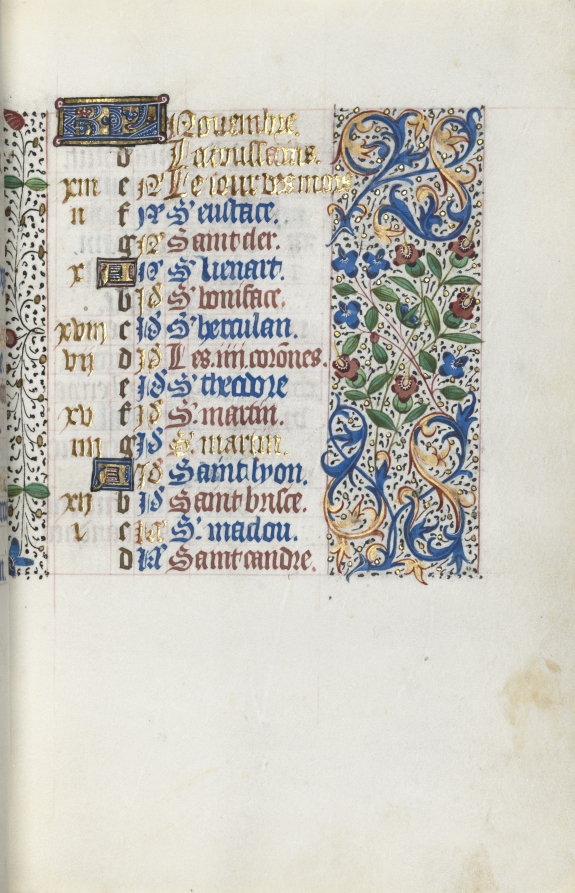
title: Book of Hours (Use of Rouen): fol. 111r, Calendar Page for November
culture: France, Rouen, 15th century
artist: Master of the Geneva Latini (French, active Rouen, 1460–80)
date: c. 1470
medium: ink, tempera, and gold on vellum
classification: Bound Volume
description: In the late 1400s and early 1500s Rouen was an established and important center of book production. The city’s cathedral had a wealthy chapter that spent large sums of money to commission books and to maintain its extensive library. The stationers and booksellers would have likely been concentrated in or near the cathedral precinct. This artist, named after a manuscript now in Geneva, was Rouen’s principal illuminator during the second half of the 1400s.